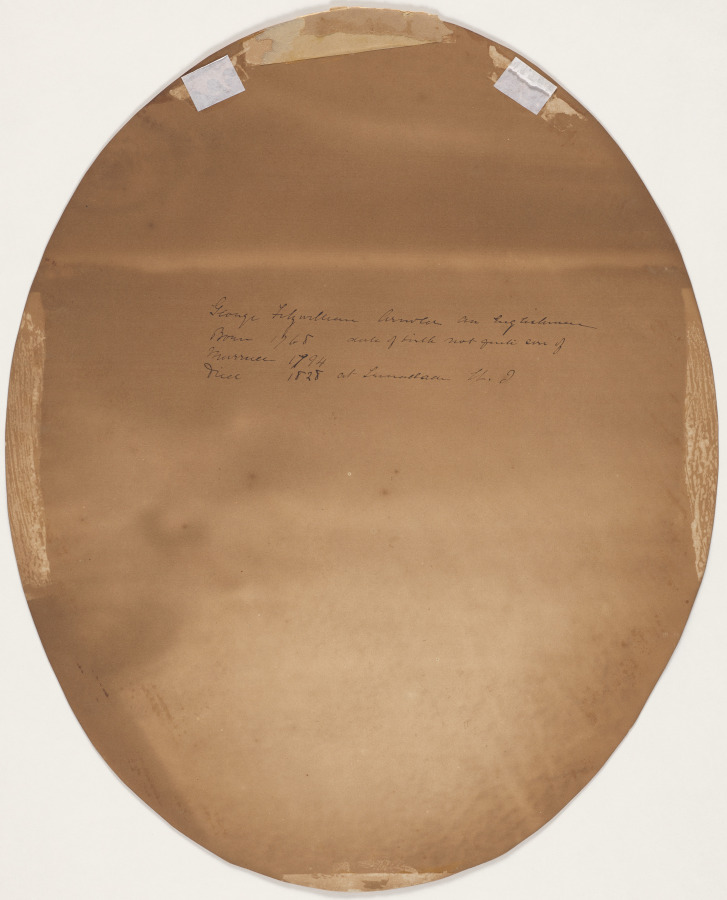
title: Portrait of Georges Arnold Fitzwilliam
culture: France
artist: Charles Balthazar Julien Fevret de Saint-Mémin (French, 1770–1852)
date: c. 1790–1852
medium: Black and white chalk on buff paper with pink wash in original frame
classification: Drawing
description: This portrait and its pair (2024.35.2), depict George Fitzwilliam, an English merchant, and his American wife Eleanor Ramsay Fitzwilliam, who sat in New York for the French émigré artist Charles Balthazar Julien Févret de Saint-Mémin. Saint-Mémin used a recently invented mechanical device called a physiognotrace to trace accurate profiles of his sitters, which he then completed in black and white chalks. The technology enabled Saint-Mémin to establish a thriving business catering to prominent Americans—including Presidents Washington, Adams, Jefferson, and Madison, Benjamin Franklin, and several Native American chiefs—at a time when he was in exile from the French Revolution. As part of each commission, Saint-Mémin also supplied etchings of the portrait in a reduced size, which could be given as keepsakes to family and friends.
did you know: The physiognotrace device used to create this portrait consisted of a wooden frame within which a sitter posed in profile; the artist then peered through an eyepiece and followed the contour and features of the sitter’s face by maneuvering a graphite pencil attached to the mechanism.